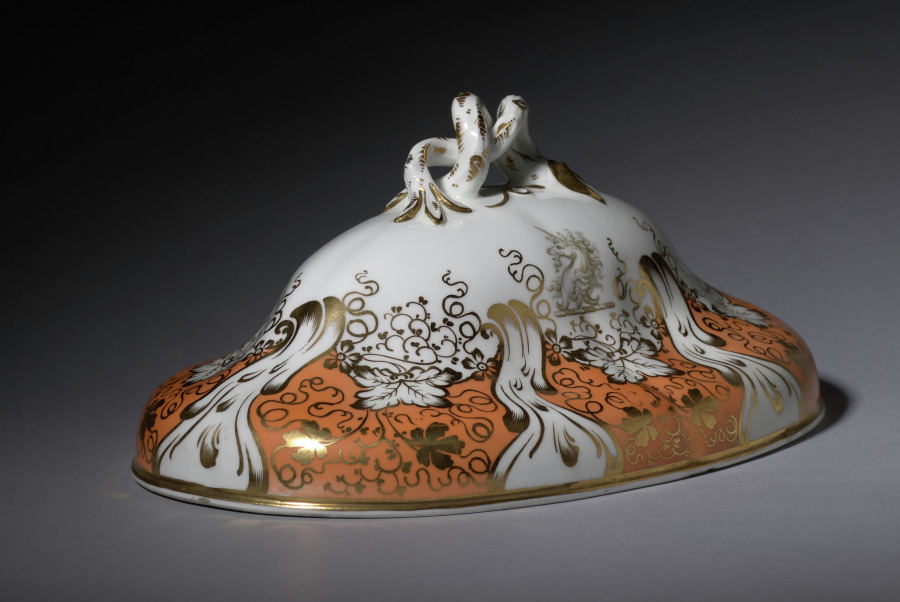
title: Vegetable Dish (lid)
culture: England, Staffordshire, early 19th century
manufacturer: Davenport Pottery and Porcelain Factory (British)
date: early 1800s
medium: ceramic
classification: Ceramic